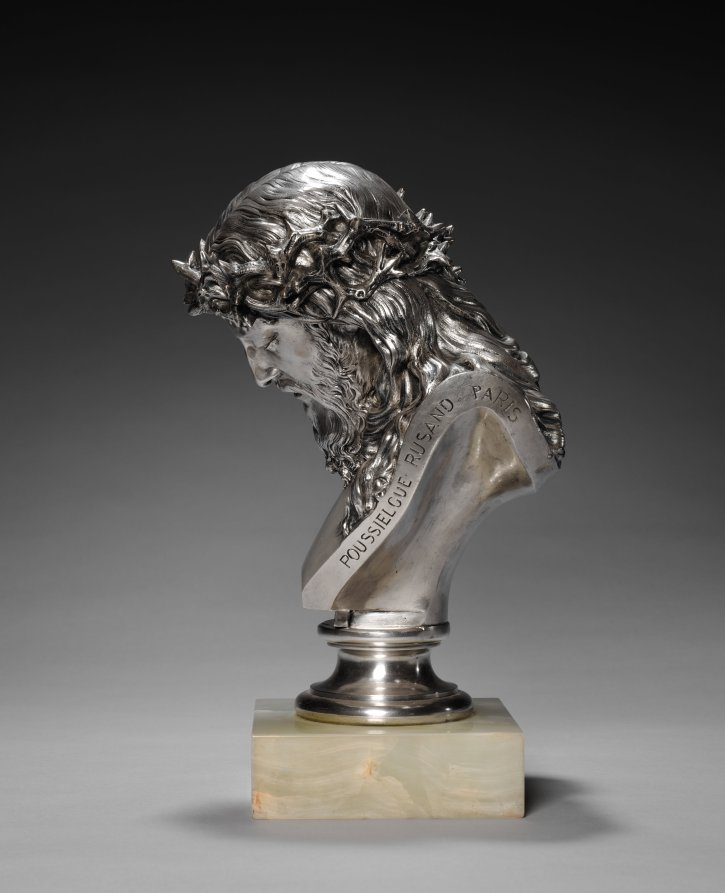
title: Head of Christ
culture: France, 19th century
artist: Jean-Baptiste Clésinger (French, 1814–1883)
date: 1867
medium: silvered bronze, marble base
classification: Sculpture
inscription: Signed in cut of right proper shoulder: "J. Clesinger, 1867"; inscribed in cut of left proper shoulder: "POUSSIELGUE RUSAND PARIS"; struck immediately above circular base: "17662"